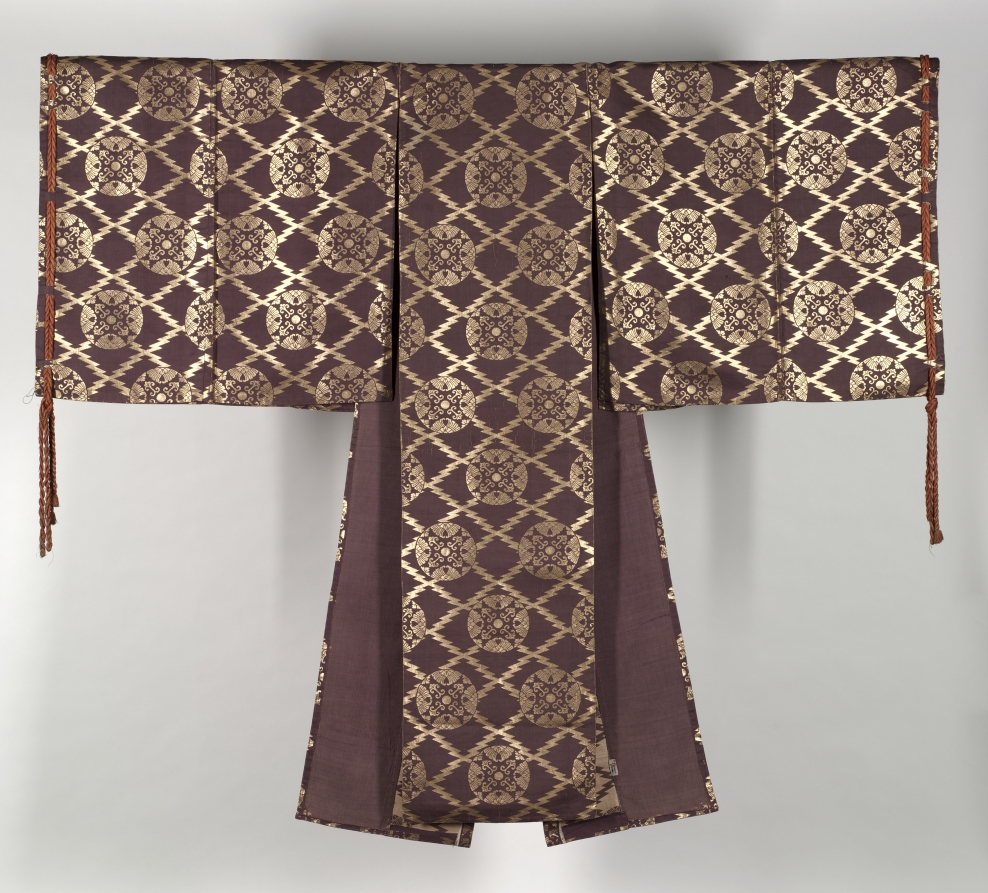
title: Noh Robe (Kariginu)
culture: Japan, Edo period (1615–1868)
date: 1800–1850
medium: silk, twill weave; metal thread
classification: Garment